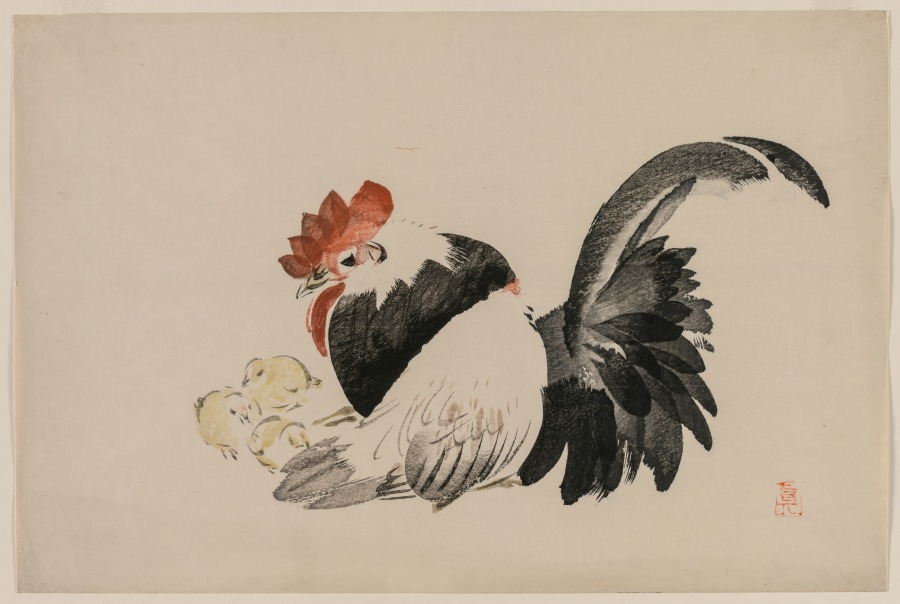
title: Rooster, Hen, and Chicks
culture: Japan, Edo period (1615–1868)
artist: Shibata Zeshin (Japanese, 1807–1891)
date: c. 1880s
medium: color woodblock print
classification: Print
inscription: Artist Seal: Shin